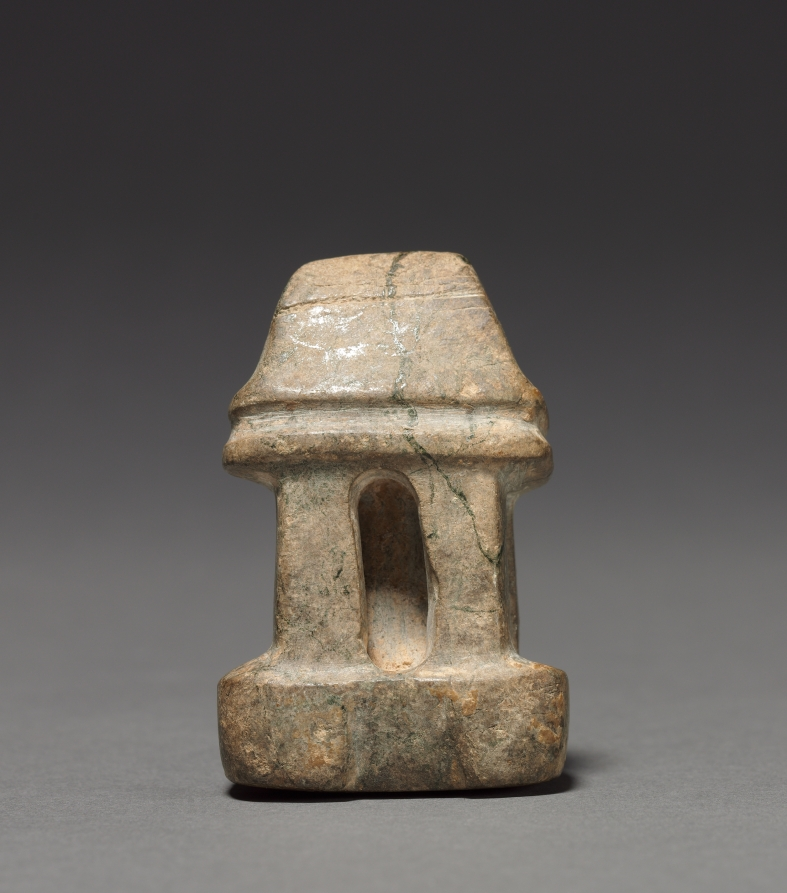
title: Architectural Model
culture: Mesoamerica, Mexico, Guerrero, Mezcala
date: 100 BCE–300 CE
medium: serpentine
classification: Sculpture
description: The Mezcala style takes its name from a river in its homeland, the Guerrero region of western Mexico. The style is known for small-scale stone sculptures including architectural “models” characterized by sleek abstraction. Because comparisons to actual architecture in the Mezcala region are scarce, it is not known whether the models refer to temples, houses, or underground funerary structures.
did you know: The Mezcala style is only identified in stone sculpture.